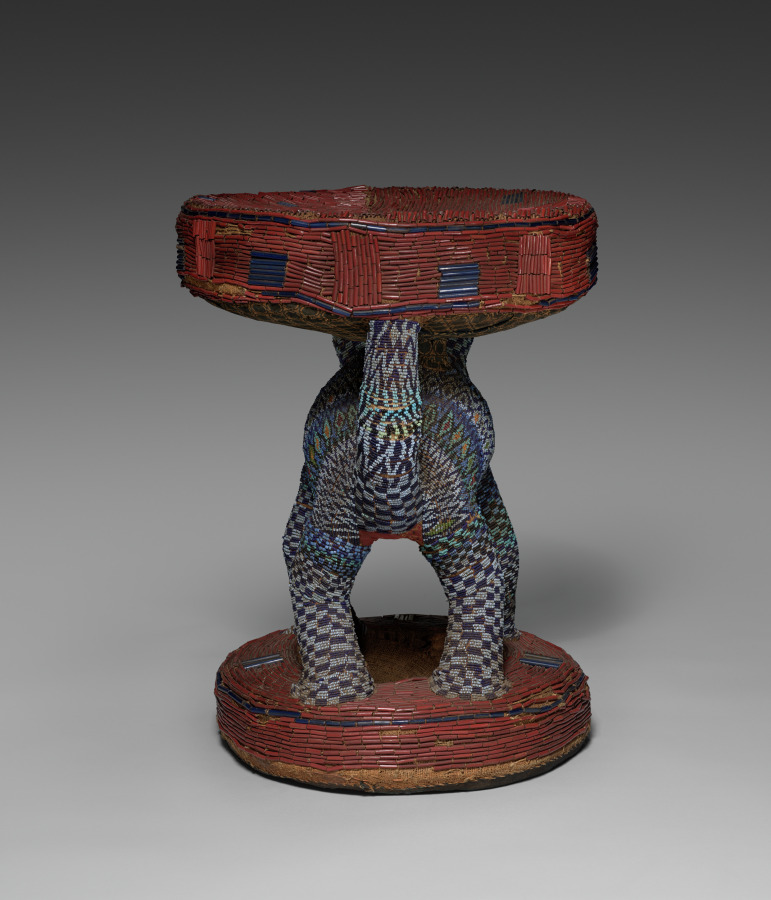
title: Prestige stool (Kuo fo)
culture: Africa, Central Africa, Cameroon, Bandjoun Kingdom, Bamileke makers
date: possibly 1800s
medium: Wood, cotton, plant fiber, glass beads, and indigo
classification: Furniture and woodwork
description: Bead-covered wooden stools and thrones are one of the most prevalent art forms among the various kingdoms and chiefdoms in the Cameroon Grassfields region. This example, once part of the royal treasury, belongs in the category of "travel stools," usually used in conjunction with more private, minor ceremonies and rituals at the palace. The leopard imagery confirms the object’s royal status. It alludes to the belief that the king could temporarily transform himself into this feared predator.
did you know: The beads on this stool were sewn on by hand. Look underneath the stool, however, and you can see commercially made printed fabric.